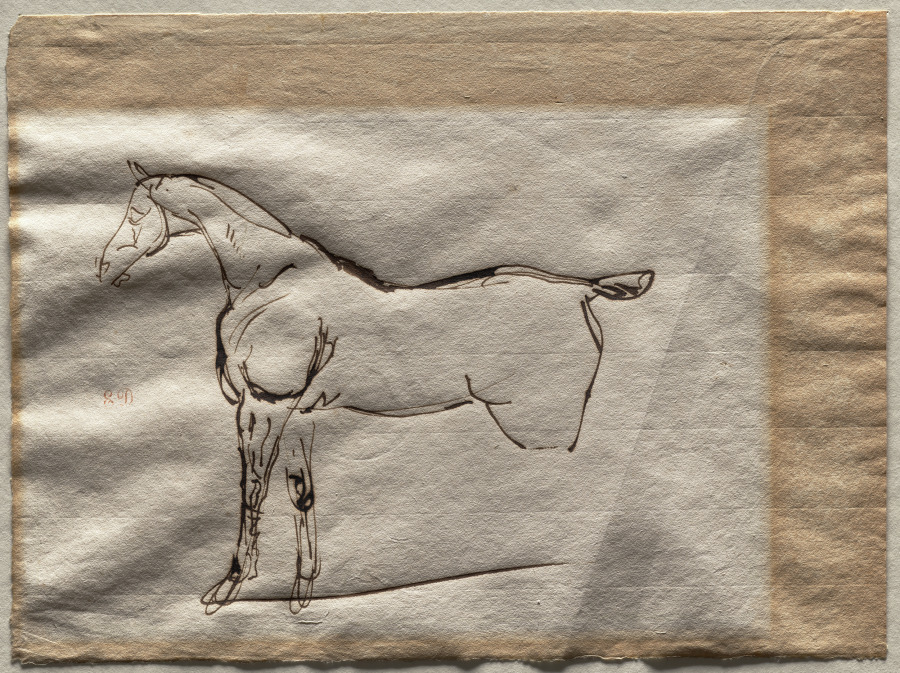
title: Study of a Horse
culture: France, 19th century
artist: Eugène Delacroix (French, 1798–1863)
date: c. 1825–30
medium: Pen and brown ink on cream laid paper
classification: Drawing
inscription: stamped, in red ink, at center left: E.D. [Lugt 838a]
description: Eugène Delacroix repeatedly depicted horses throughout his career, visiting stables to observe the animals at rest and in motion. This sheet is likely one such example made from life. Delacroix loosely sketched the horse's form, concentrating on the tension of its front legs and leaving the rest of its body loosely rendered. Through such exercises, the artist hoped to eventually master this subject.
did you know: Although Eugène Delacroix created a realistic representation of a horse in this drawing, the animals sometimes served as symbols for the conflict between man and nature in his work.